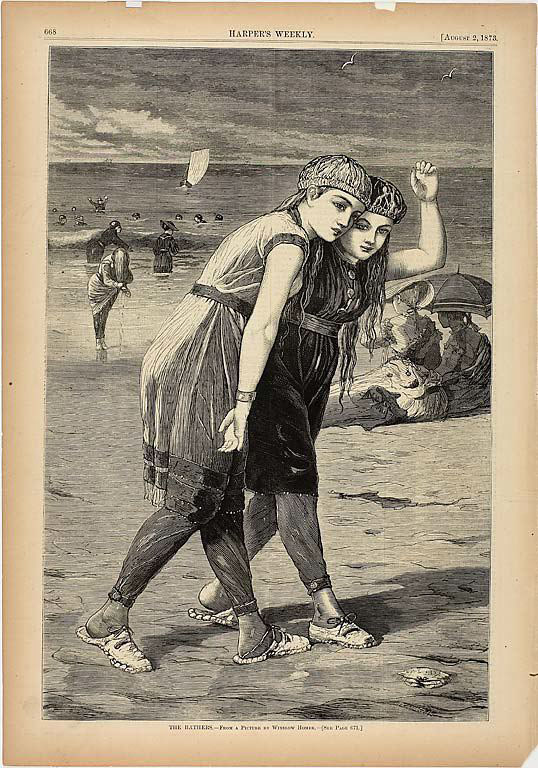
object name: Print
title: The Bathers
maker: Winslow Homer (American, 1836-1910); published by Harper's Weekly (American, 1857-1916)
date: published August 2, 1873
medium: Wood engraving on paper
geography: United States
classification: wood engraving; print; prints and drawing